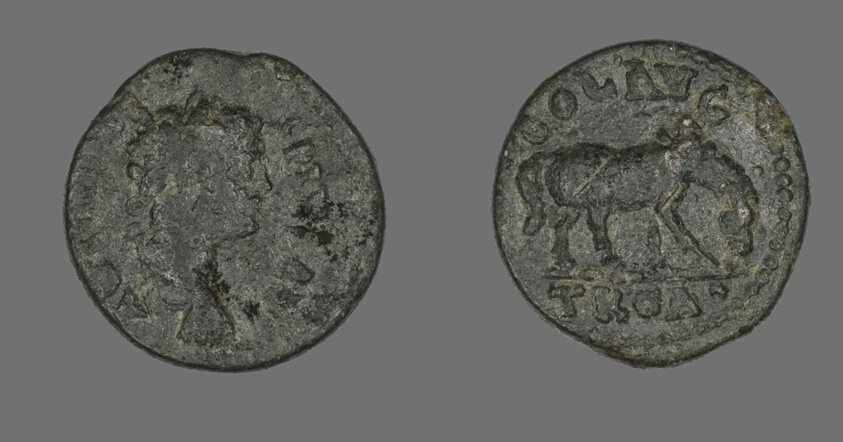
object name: Coin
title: Coin Portraying Emperor Caracalla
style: roman (ancient, style or period), ancient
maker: Roman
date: 198-217 CE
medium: Bronze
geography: Roman Empire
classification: coin; ancient art